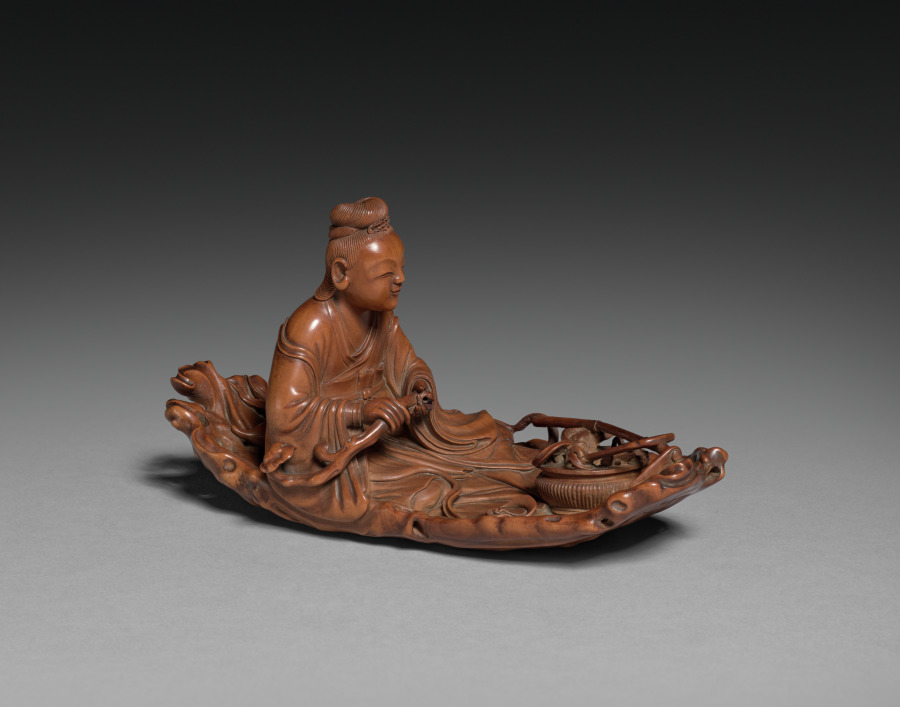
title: Figure of Daoist Immortal He Xiangu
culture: China, Qing dynasty (1644-1911)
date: 1700s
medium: Boxwood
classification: Wood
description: He Xiangu is one of the Eight Immortals in the Daoist pantheon. She was thought to have been a real person who lived in the Tang dynasty, originally named He Qiong. As a teenager, she was instructed in a dream to eat powdered mica to become immune from death and to vow to remain unmarried. She did so and became an enlightened practitioner of Daoism. In this delicate carving, He Xiangu is placidly seated in a gnarled and knotty wooden raft amid green-tinted ivory waves. In front of her rests a bamboo basket filled with objects associated with Daoist immortality, and she holds a branch of lingzhi fungus like an oar.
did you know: The lingzhi she holds is a woody mushroom often used in traditional Chinese medicine and associated with immortality.